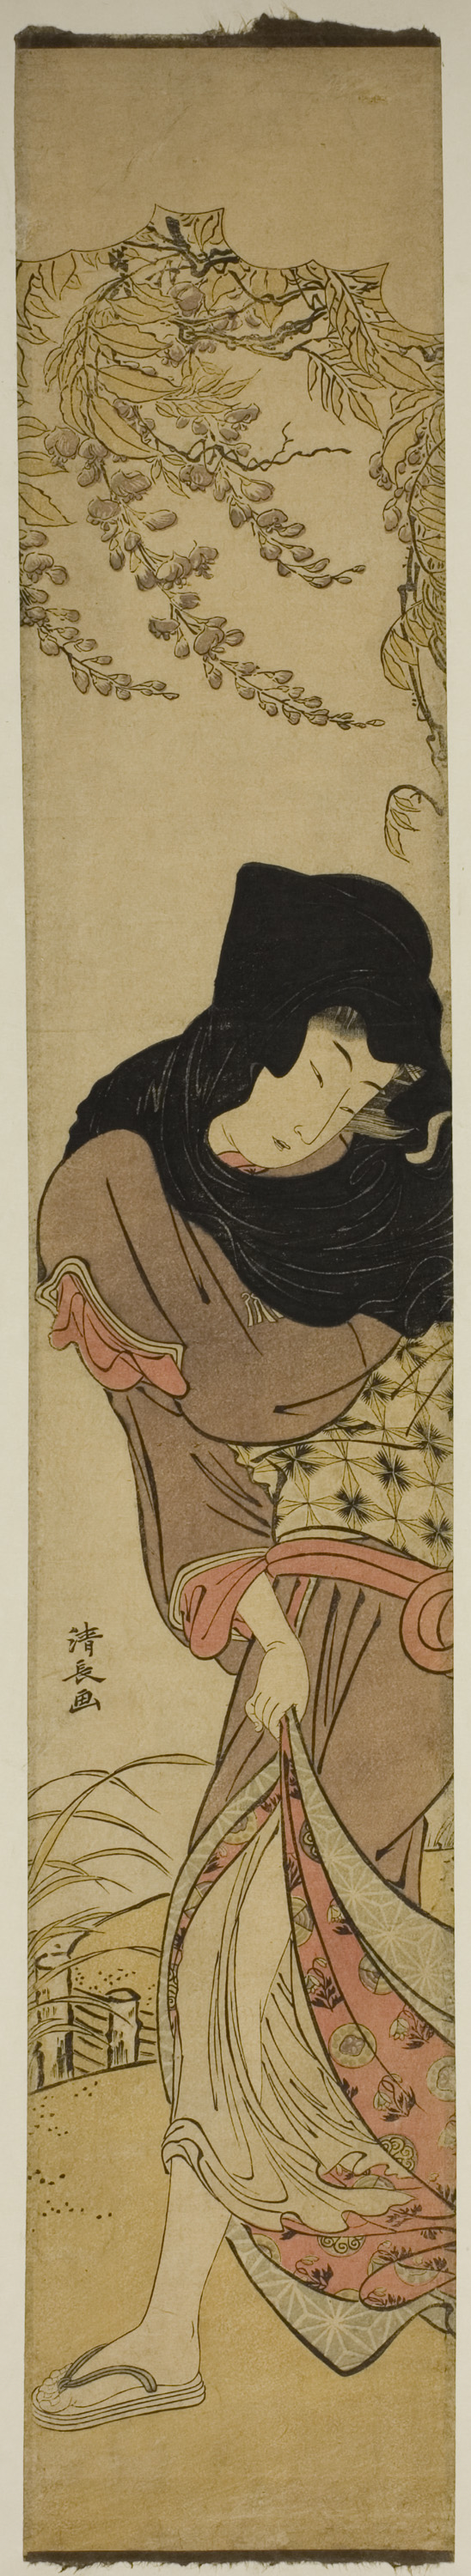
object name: Print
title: Woman under Windblown Wisteria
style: Japanese (culture or style)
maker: Torii Kiyonaga (Japanese, 1752-1815)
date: c. 1780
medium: Color woodblock print; hashira-e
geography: Japan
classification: woodblock print; print; asian art